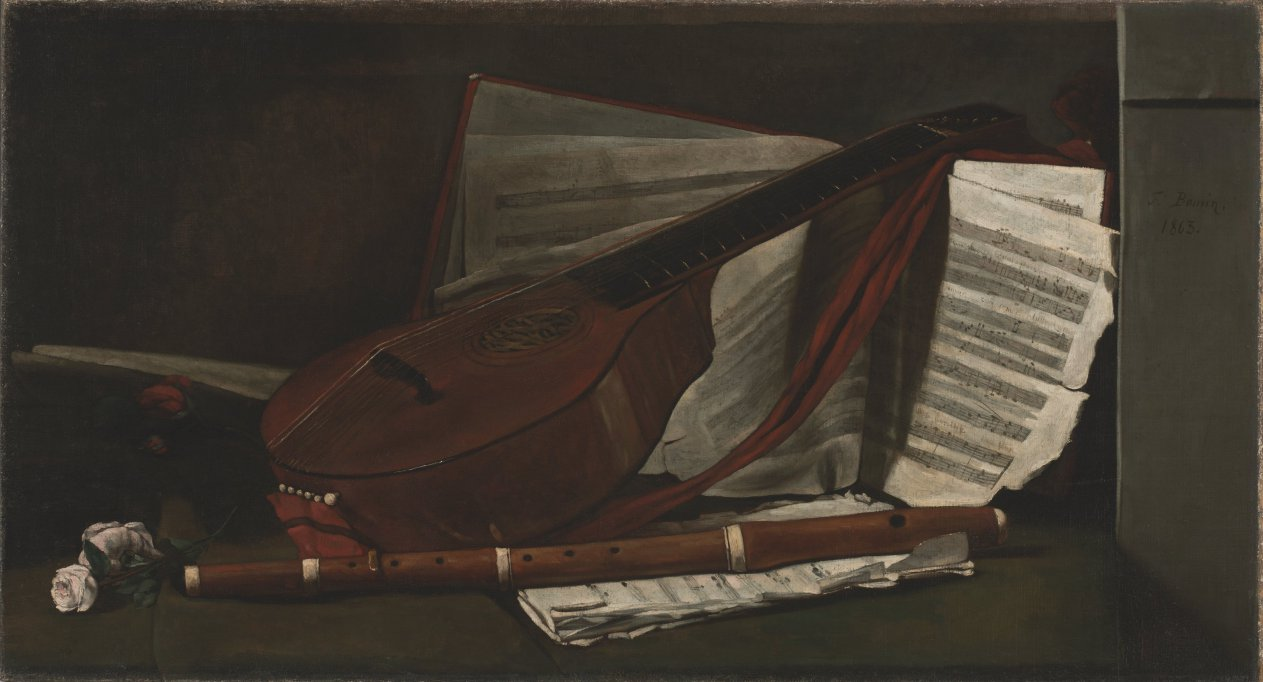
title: Attributes of Music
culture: France, 19th century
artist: François Bonvin (French, 1817–1887)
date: 1863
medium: oil on fabric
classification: Painting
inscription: Signed upper right, in umber paint: F.s Bonvin / 1863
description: A lute and flute rest on top of sheet music. This painting was intended to hang above a door, opposite still lifes that represented the other fine arts of painting and sculpture (the two related paintings are in the Musée du Louvre, Paris). Bonvin was part of the 19th-century movement known as Realism. Led by Gustave Courbet (1819-1877), the Realist painters were interested in depicting the world that surrounded them, as well as the popular culture of their time.